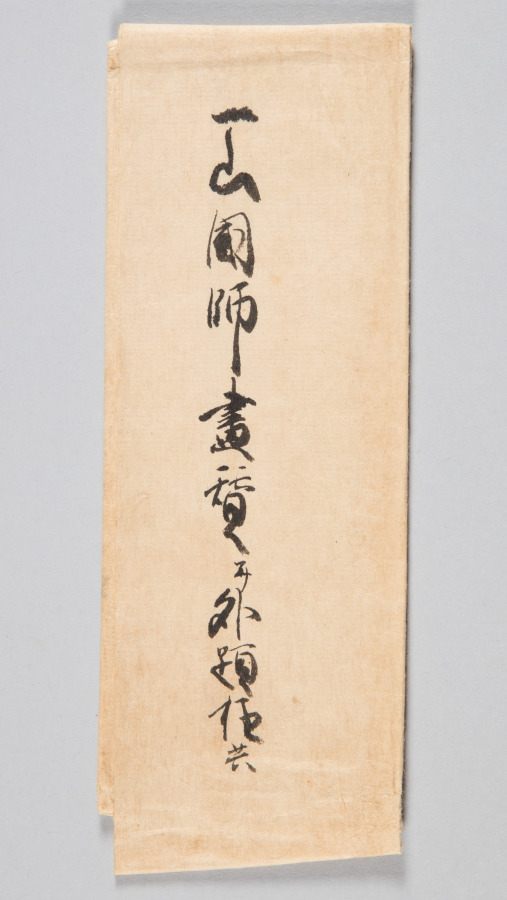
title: Reeds and Geese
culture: Japan, Kamakura period (1185–1333)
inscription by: Yishan Yining [Issan Ichinei] (Chinese, 1247–1317)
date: 1314–17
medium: hanging scroll; ink on paper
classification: Painting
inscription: signed: Issan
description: Reeds and geese has been a common pairing in Chinese literary and visual culture for many centuries. This painting presents the contribution of a Japanese amateur painter, almost certainly a Zen Buddhist monk, to Japan’s fledgling efforts to add the theme to its own cultural vocabulary in the early 1300s. As was customary at the time in Japan, the painter did not sign or seal his work; the inscription, a poem added to the painting by the eminent émigré monk Yishan Yining, along with his signature and seal, was of far greater cultural value. Today, the modestly sized painting has tremendous significance as one of the earliest surviving examples of Japanese ink paintings with reeds and geese.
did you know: Tokyo National Museum owns a copy of this painting made by Kano Gyokusen (1796–1864) when he was 14 years old.